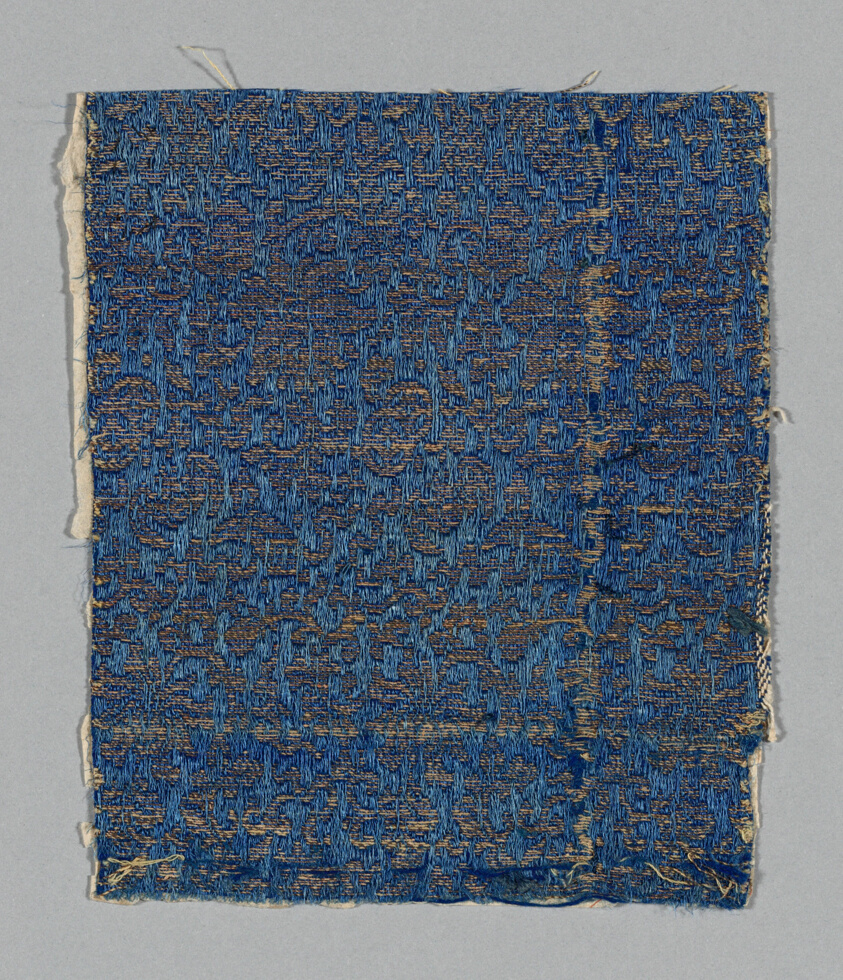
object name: Textile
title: Fragment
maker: China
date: late 18th century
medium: Silk and gold-leaf-over-lacquered-paper strip wrapped cotton, satin weave with twill interlacings of secondary binding warps and patterning wefts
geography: China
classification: textile; weaving